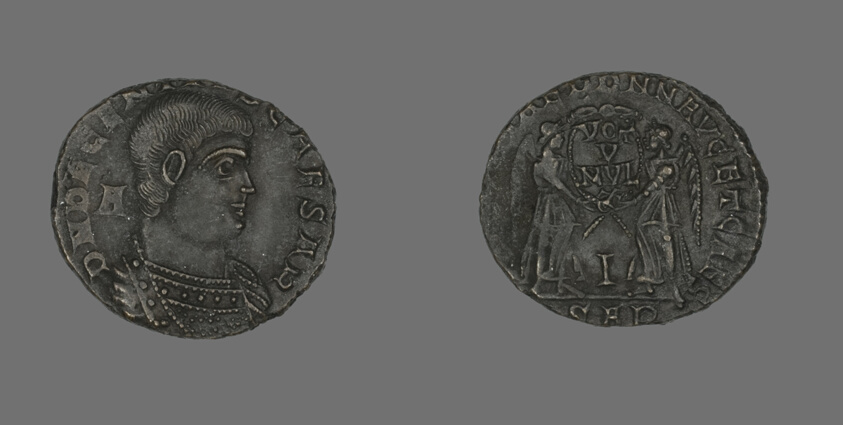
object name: Coin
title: Coin Portraying Emperor Decentius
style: roman (ancient, style or period), ancient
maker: Roman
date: 351-353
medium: Bronze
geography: Roman Empire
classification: coin; ancient art